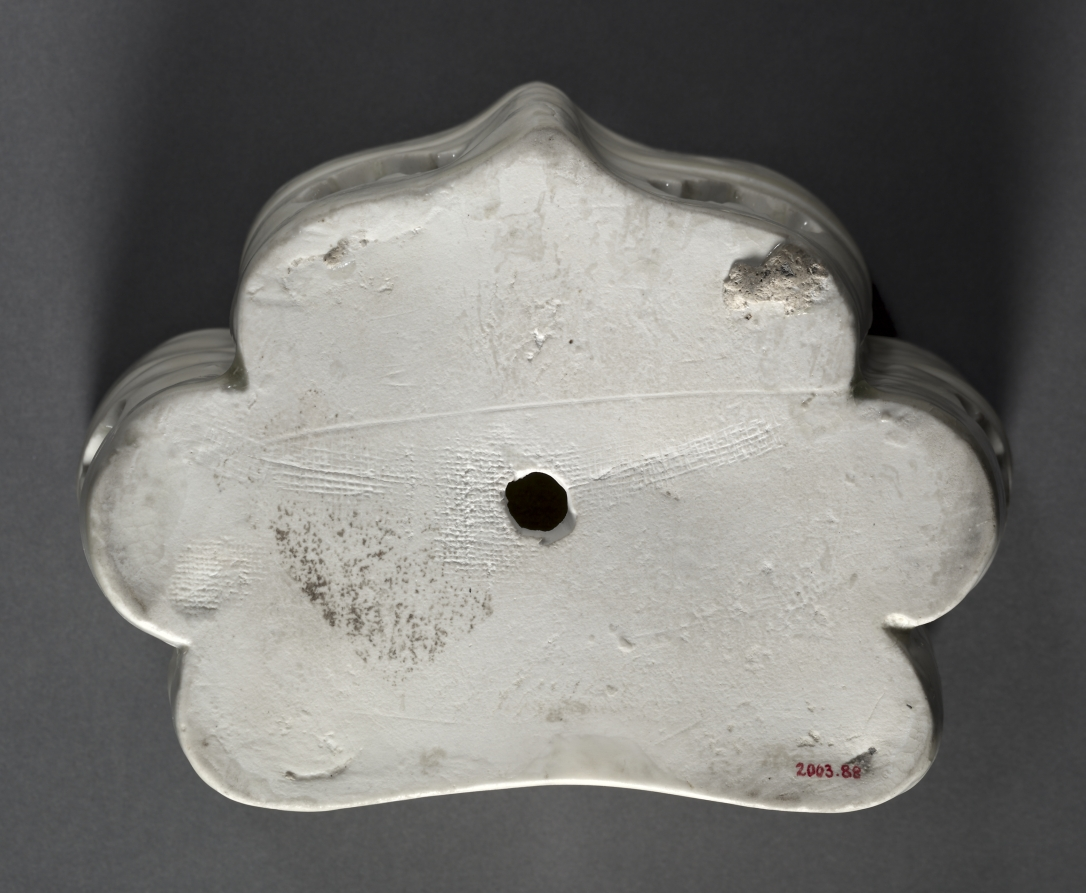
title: Cloud-Collar Pillow with Waves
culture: China, Jiangxi Province, Northern Song dynasty (960–1127)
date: 1000s–1100s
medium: glazed porcelain with incised and carved decoration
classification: Ceramic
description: This ceramic pillow in the form of a cloud—a design pattern variously referred to as ruyi, the shape of a head of an auspicious scepter—is a fine example of qingbai ware from Jiangxi province. It has a pure white body covered with a transparent, glassy glaze that carries a faint greenish tinge, thus giving it another name, yingqing, or "shadow blue." On the surface of the pillow is a carved and incised design of repeating wave patterns. The beauty of this piece lies in its elegance of form, simplicity of design, and delicacy of workmanship.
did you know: While ceramic might not be your choice for a pillow, it actually kept the user cool as they slept.